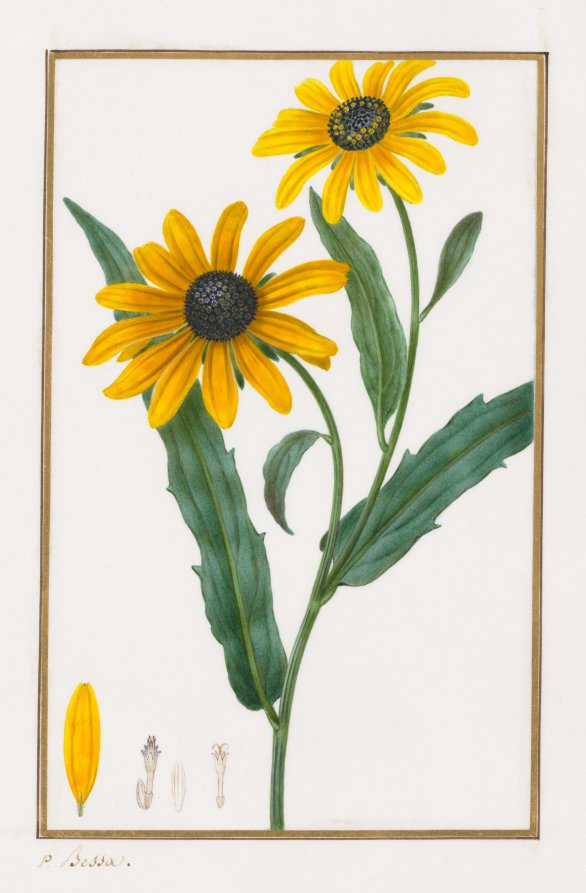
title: Black-eyed Susan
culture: France, 19th century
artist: Pancrace Bessa (French, 1772–1846)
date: 1828–1835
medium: pencil and watercolor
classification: Drawing